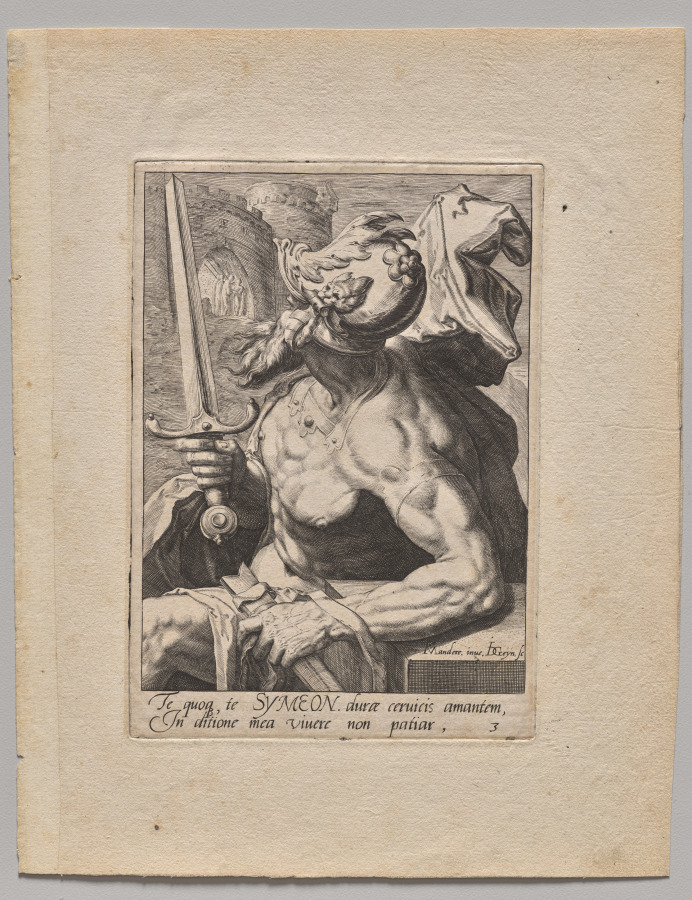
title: Plate 3: Simeon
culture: Netherlands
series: The Twelve Sons of Jacob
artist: Jacob de Gheyn II (Netherlandish, 1565–1629)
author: after Karel I van Mander (Netherlandish, 1548–1606)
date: c. 1589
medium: engraving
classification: Print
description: In this print, the biblical figure Simeon is posed with a sword and wearing armor, denoting the violent acts he perpetrated in his life. This is one of a series of prints depicting the twelve sons of Jacob, each with an attribute and costume that denotes his character. According to the Old Testament, Jacob blessed each of his twelve sons, prophesizing the destiny of their tribe, and assigning them a parcel of land in Canaan. The print series was made in the Netherlands in the late 16th century, a time of political struggle when Old Testament heroes were popular exemplars of fortitude and patience.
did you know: The bellicose nature of this figure is emphasized by his flying cloak and muscular frame, which turns away from the viewer and toward the possible subject of his ire.